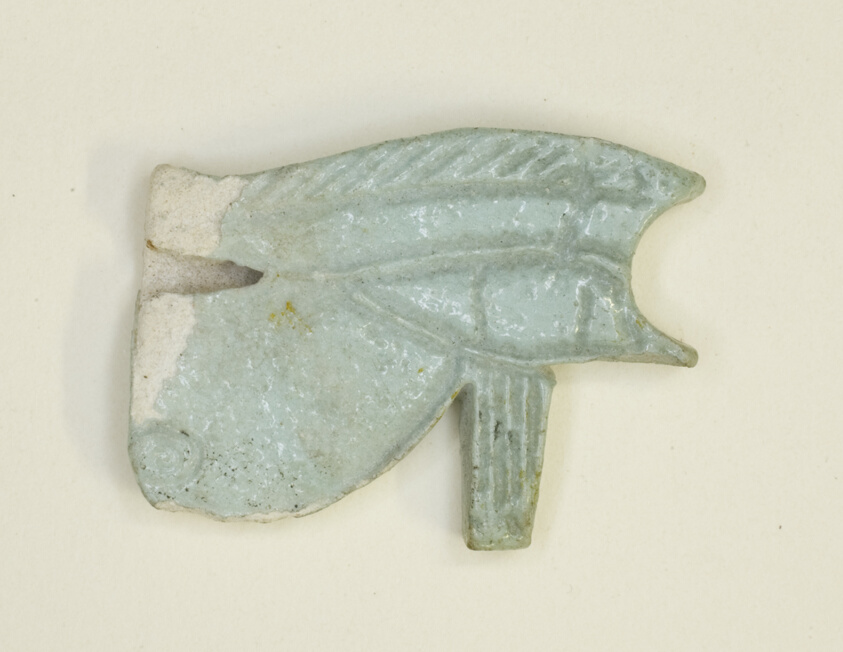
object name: Costume and Accessories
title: Eye of Horus (Wedjat) Amulet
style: third intermediate period, ancient, egyptian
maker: Egyptian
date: Third Intermediate Period, Dynasty 21–25 (about 1069-664 BCE)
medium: Faience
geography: Egypt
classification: amulet; ceramics; jewelry; ancient art; costume; faïence (composite material)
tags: eye of Horus